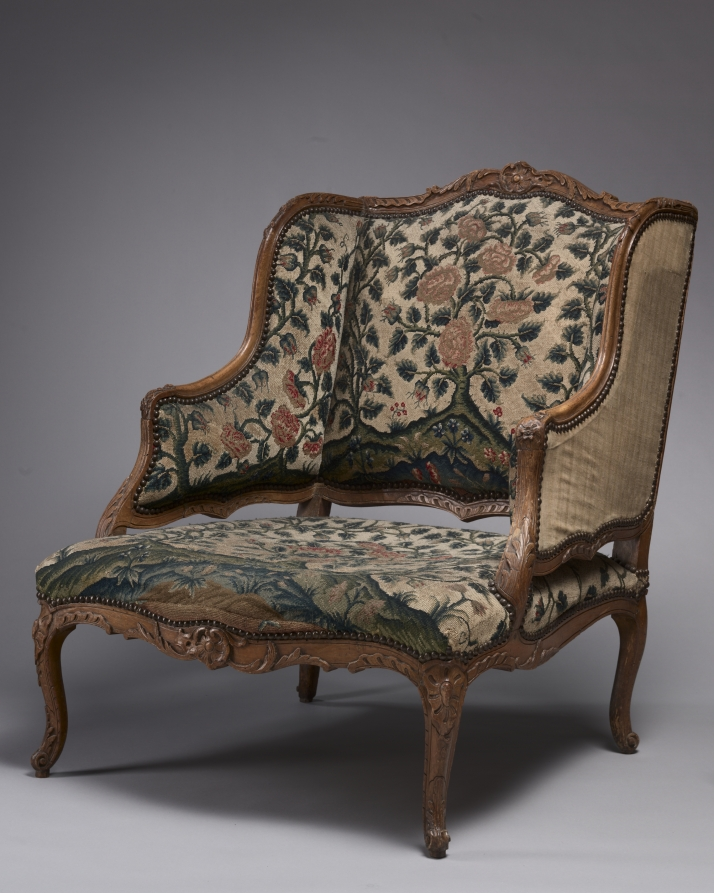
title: Daybed Armchair (Duchesse brisée)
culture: France, style of Louis XV, 20th century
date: c. 1890–1940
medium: carved wood frame upholstered in needlework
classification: Furniture and woodwork